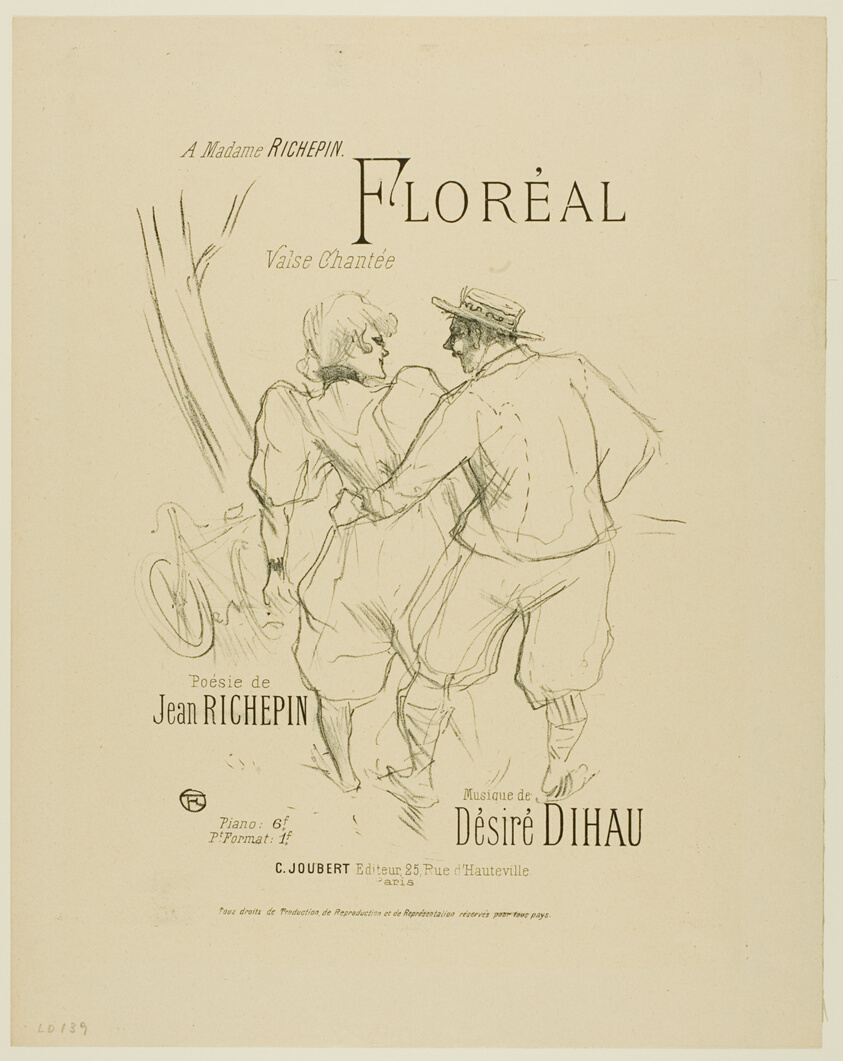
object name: Print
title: Floréal, from Mélodies de Désiré Dihau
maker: Henri de Toulouse-Lautrec (French, 1864-1901)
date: 1895, printed and published 1935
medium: Lithograph, with text added, on tan wove paper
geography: France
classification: lithograph; print; prints and drawing